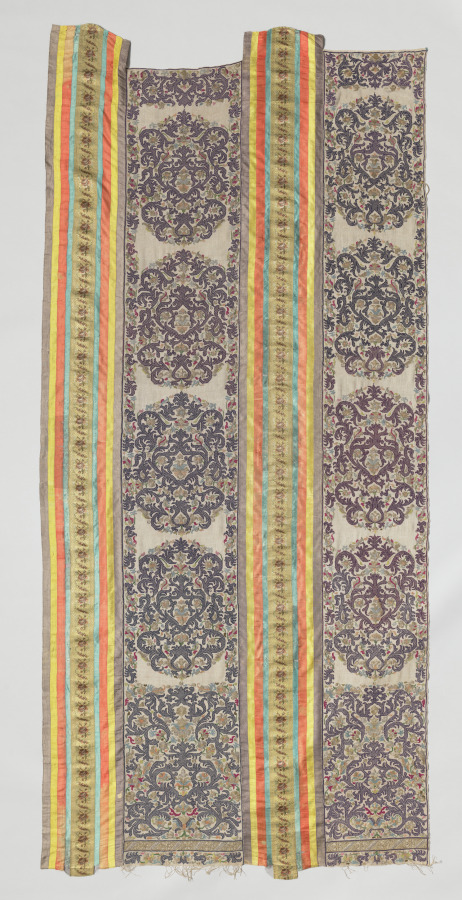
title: Curtain panel (sitara)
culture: Africa, North Africa, Algeria, Algerian weaver and embroiderer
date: 1800s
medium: Linen, silk, gold, silver, dye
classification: Embroidery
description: During the 1700s, stunning large embroidered door curtains such as these hung across doorways onto interior courtyards of multistoried residences. Light entered through their loosely woven linen ground while the reversible embroidered decoration provided beauty and privacy. Such curtains have three embroidered widths, the third missing here, joined by colorful plain silk ribbons flanking a French floral ribbon in the center.